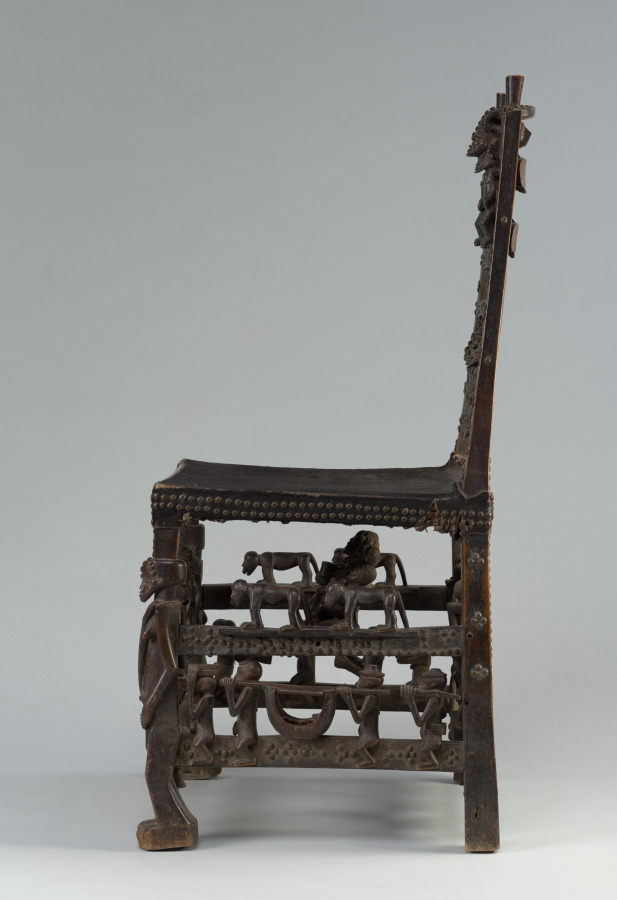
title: Ceremonial Chair or Throne (citwamo ca mangu)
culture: Africa, Central Africa, Angola, Chokwe-style carver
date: 1800s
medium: Wood, upholstery studs, leather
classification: Furniture and woodwork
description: This citwamo ca mangu chair bears over 40 sculpted figures arranged in complex compositions across the chair’s top rail (back), stretchers (rungs), and legs; all symbolize the power of Chokwe supreme chiefs. Such chairs typically bear a dozen or fewer figures. Scenes of royal life and power wrap around the seat, reinforcing how the chief and his family are at the center of their polity and its business.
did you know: Starting around the 1500s, Chokwe and other African leaders and traders received fine chairs as gifts from Portuguese traders. Chokwe leaders adapted this symbol of power as their own, using it in tandem with stools, an earlier kind of prestige seat.